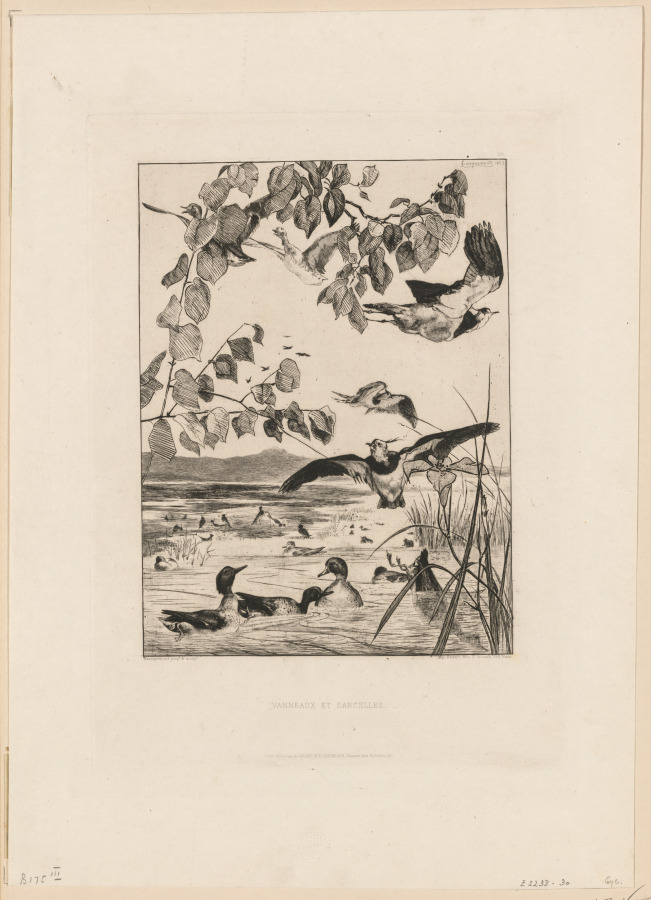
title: Lapwings and Teals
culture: France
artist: Félix Bracquemond (French, 1833–1914)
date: 1862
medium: etching on laid paper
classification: Print